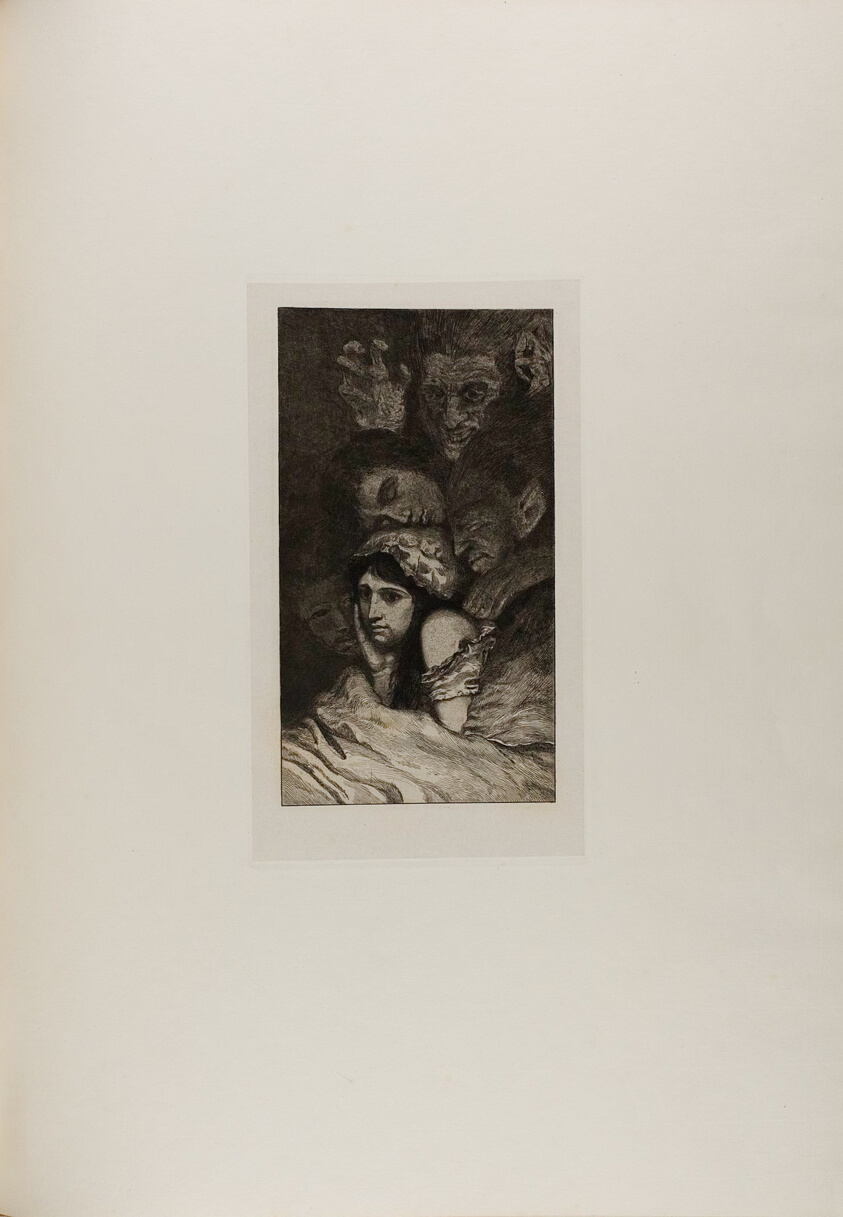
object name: Print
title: Dreams, plate three from A Life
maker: Max Klinger (German, 1857-1920); printed by Otto Felsing (German, 19th century)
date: 1884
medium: Etching and aquatint, with stipple on ivory China paper, laid down on cream laid paper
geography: Germany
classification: etching; print; prints and drawing